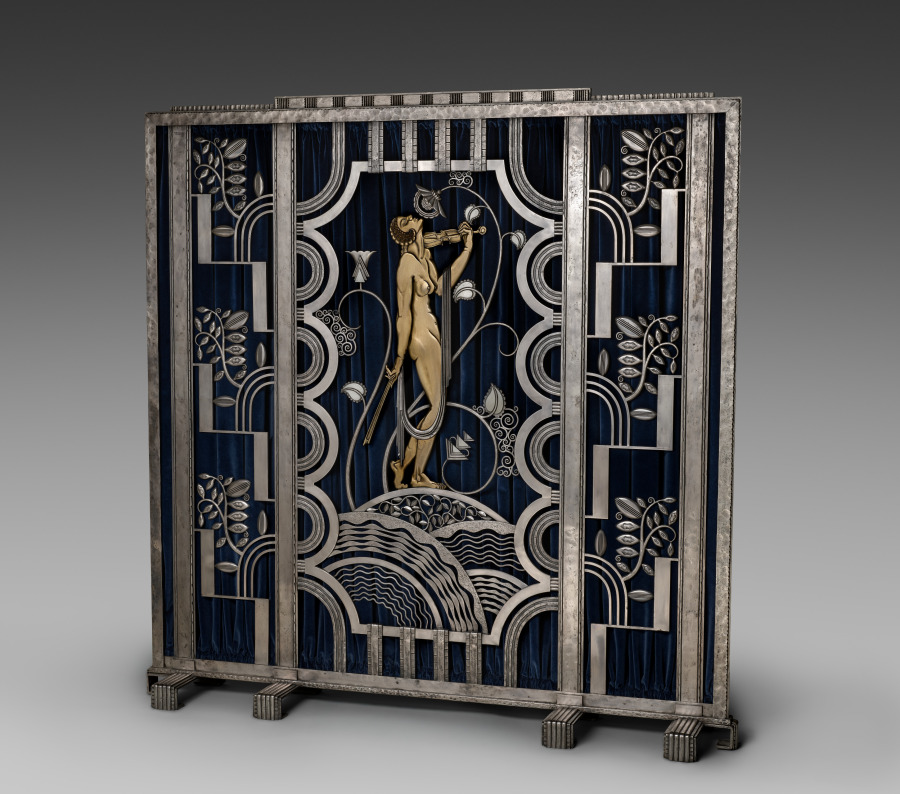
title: Muse with Violin Screen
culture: America, Ohio, Cleveland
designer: Paul Fehér (American, born Hungary, 1898–1990)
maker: Rose Iron Works (America, Ohio, Cleveland, est. 1904)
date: 1930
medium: Steel, brass; silver and gold plating, cotton velveteen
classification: Metalwork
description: Since the early years of the 20th century, the Rose Iron Works, a Cleveland supplier of architectural ornament, has produced distinguished metalwork. The company’s founder, Martin Rose, was born in Austria-Hungary and studied ornamental metalsmithing in Vienna prior to immigrating to Cleveland in 1902. In the 1920s, he hired a talented young Parisian designer, Paul Fehér, to work for the firm. Fehér’s designs, culminating in this massive screen, brought a modern European sensibility to the Rose Iron Works production. With its geometric patterning, highly stylized and abstracted natural forms, and the central figure reminiscent of the celebrated jazz singer Josephine Baker, this screen reflects the classic motifs of Art Deco design.